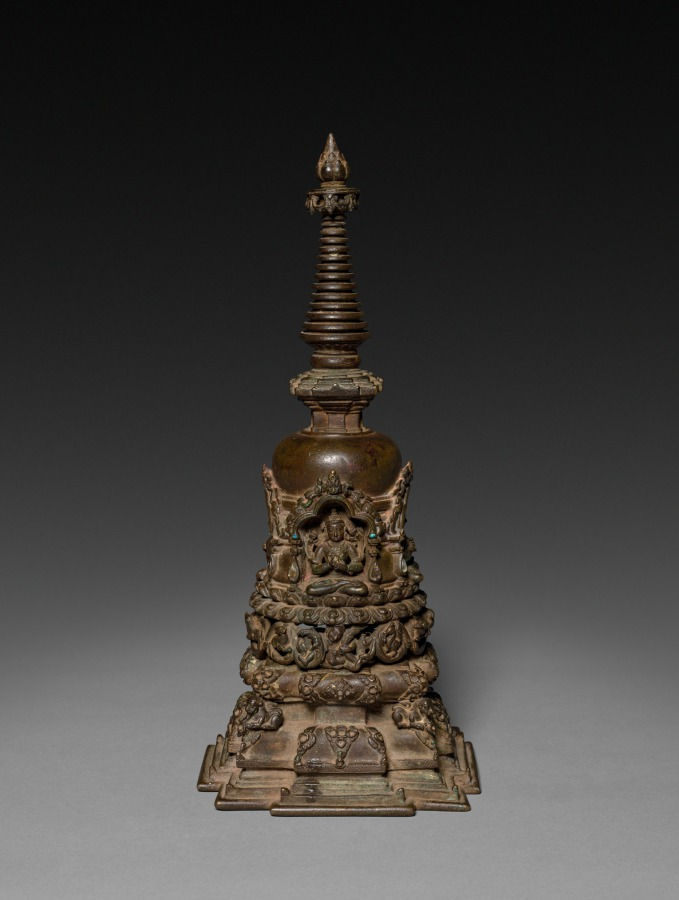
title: Miniature Votive Stupa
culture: Eastern India, Bihar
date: c. 1000s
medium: bronze with inlay of semiprecious stones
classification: Sculpture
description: Small-scale stupas were modeled on large monuments that contain relics of the Buddha or revered members of the Buddhist community within the solid, dome segment. Such models were made to commemorate a devotional visit to the monument. Four different sacred Buddhist images face each of the four directions: Shakyamuni, Vajrasattva, Maitreya, and Prajnaparamita.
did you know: The spire consists of thirteen disk-like parasols that refer to the thirteen stages on the path to enlightenment.